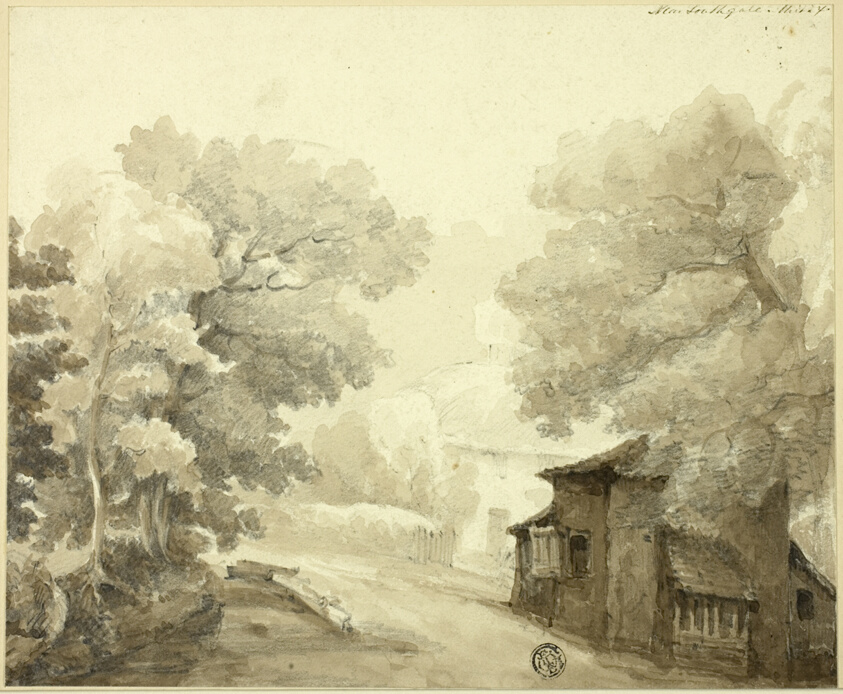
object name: Drawing and Watercolor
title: Near Southgate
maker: Attributed to Frederick Wilton Litchfield Stockdale; English, c. 1803-1848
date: 1815/1825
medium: Brush and brown wash with graphite on ivory wove paper, laid down on card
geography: England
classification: ink or chalk wash; drawings (visual works); prints and drawing